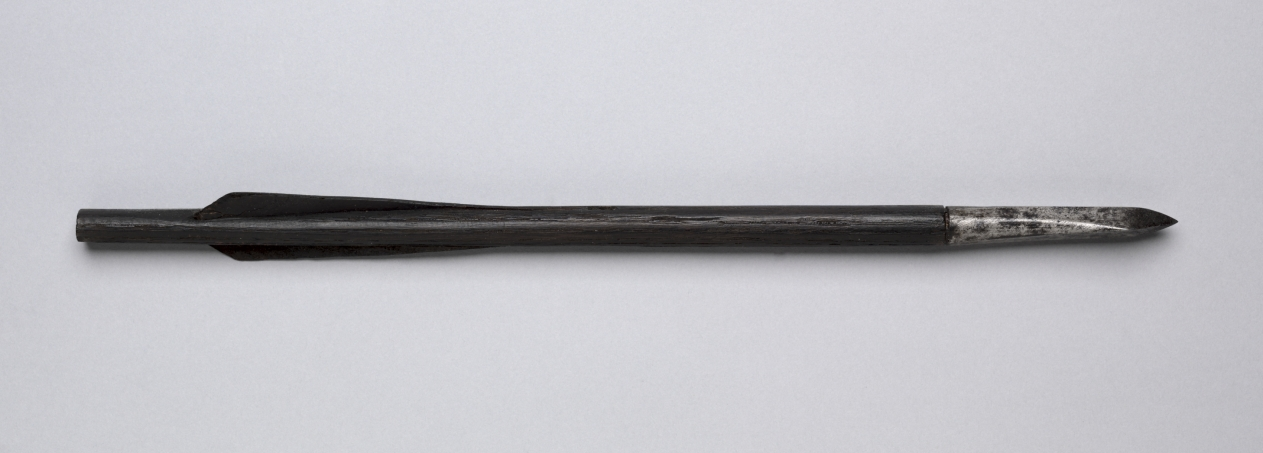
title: Crossbow Bolt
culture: Germany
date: 1500s–1600s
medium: wood, leather, steel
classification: Arms and Armor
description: Created by skilled technicians from wood, steel, and leather, each bolt was handmade with slight differences in construction and design. These bolts were used with a crossbow and they were more powerful than traditional bows and arrows. A soldier could carry many bolts and still maneuver easily around the battlefield.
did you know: Bolts with leather feathering were used mainly in the Tyrolean area, which includes northern Italy and western Austria.